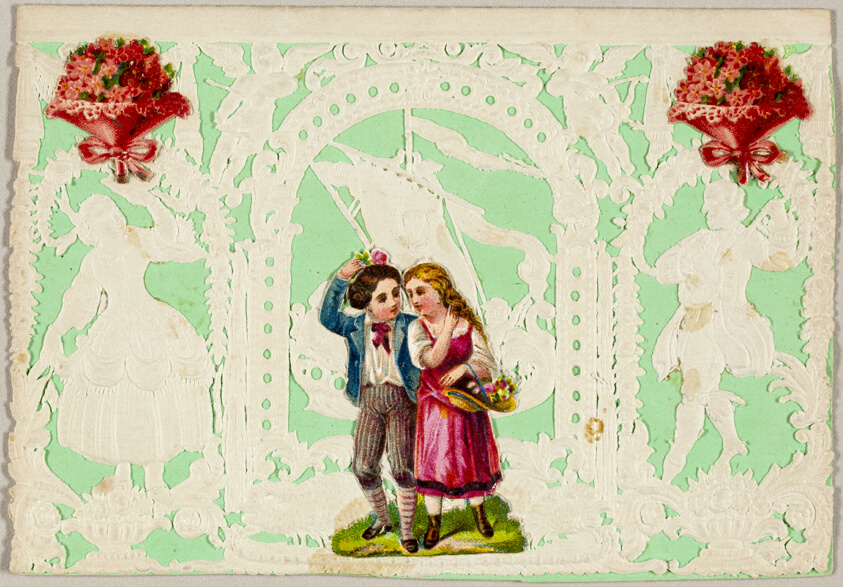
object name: Drawing and Watercolor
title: Untitled Valentine (Boy and Girl with Basket)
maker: Thomas Wood (English, 19th century)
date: 1850/59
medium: Collaged elements on cut and embossed (designed) ivory wove paper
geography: England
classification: collage; valentine; prints and drawing; paper